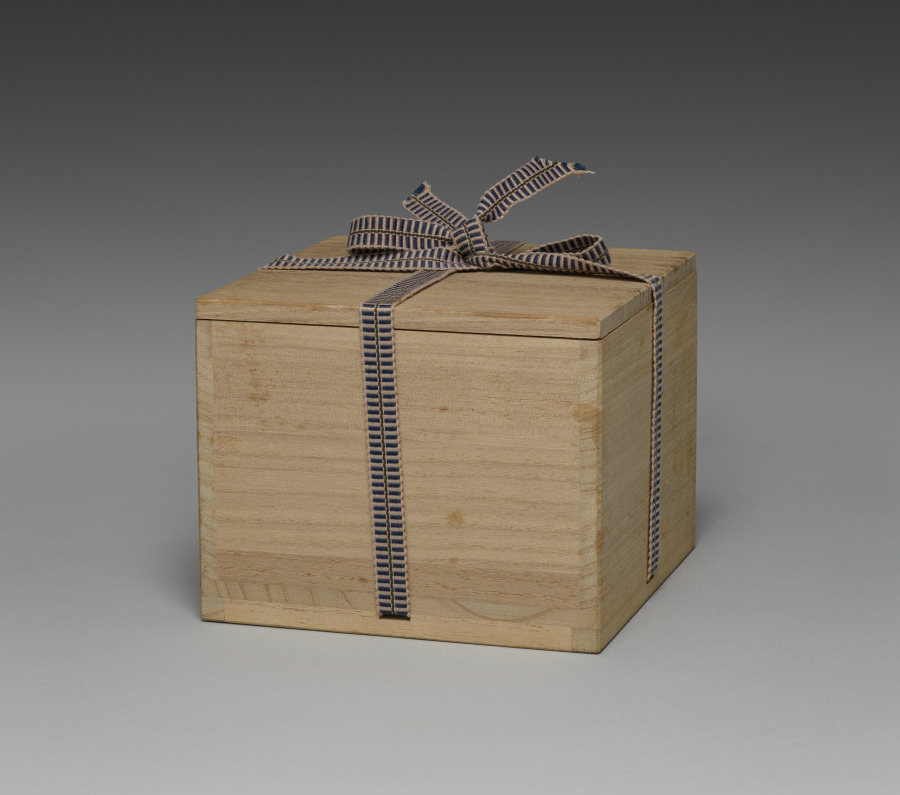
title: Bowl with Chinese Landscape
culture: Japan, Meiji period (1868–1912)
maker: Seifū Yohei III (Japanese, 1851–1914)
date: 1893–1914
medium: porcelain with underglaze blue and overglaze red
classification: Ceramic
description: This bowl has a landscape with figures in blue and iron oxide. The scene is set along a river with mountains in the distance, likely in the Jiangnan region of southern China, famous for compositions of the Eight Views of the Xiao and Xiang Rivers and of West Lake in Hangzhou. There are two people in the foreground: one person fishes along the riverbank across from a rustic hermit’s lodge sited on stilts over the water’s edge; on the other side of the bowl, a person with a tall staff gazes at the full moon, accompanied by his servant. The foot has a double band in blue, while another blue band encircles the bowl just beneath the rim, which is covered in red iron oxide. The inside of the footring is also circled in blue around the impressed mark.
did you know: The flock of geese making its way across the sky and the many bare tree branches suggest the season may be autumn.